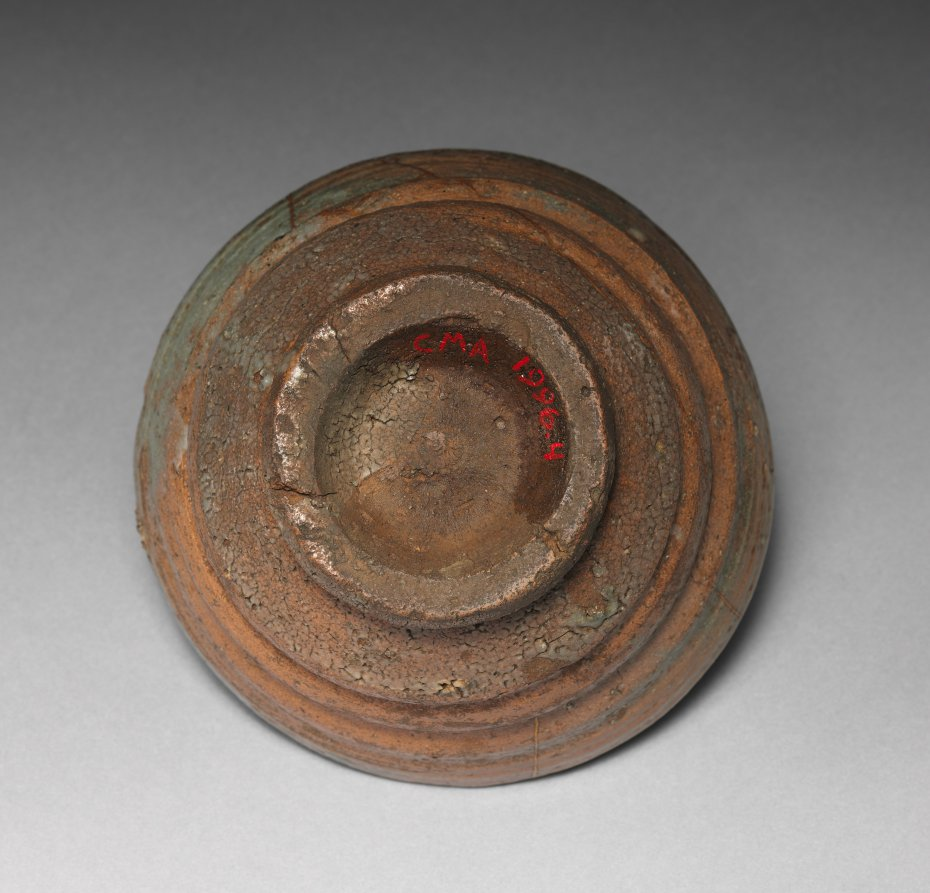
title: Tea Bowl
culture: Korea, Joseon dynasty (1392–1910)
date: 1600s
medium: glazed stoneware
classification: Ceramic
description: This type of wide-mouthed bowl was used every day in Korea, not exclusively for tea drinking. But when it was introduced to Japan around the early 16th century, its imperfect appearance, which evokes the aesthetics of wabi-sabi, caused it to be repurposed as a tea bowl. Korean tea bowls were circulated as a item of foreign luxury among Japanese military elites. This type of tea bowl may have been produced in one of the kilns established and operated by the trading office (Waegwan) in Busan, southern Gyeongsang province, as an export item for Japanese tea bowl collectors.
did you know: For its imperfect aesthetics, this type of rustic tea bowl was highly appreciated among advanced Japanese practitioners of the tea ceremony.